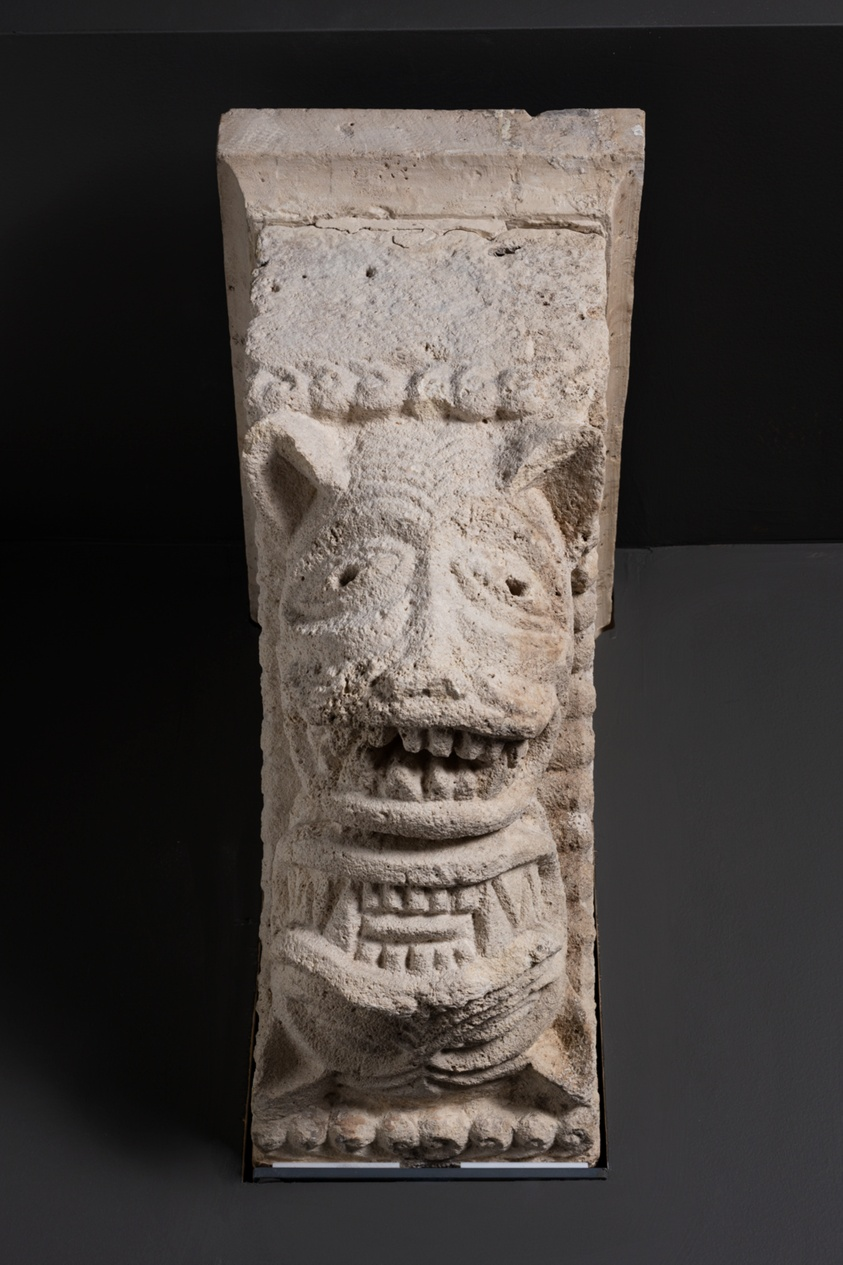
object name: Sculpture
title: Corbel with Two Animal Masks from the Monastery Church of Notre-Dame-de-la-Grande-Sauve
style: medieval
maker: French; Aquitaine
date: 1150/1200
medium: Limestone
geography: France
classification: sculpture; architectural detail; architectural fragment; architecture; fragment; france; french; limestone; sculpture/stone; stone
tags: corbel, animals, architechture, architectural, architectural detail, architectural fragment, architectural fragments, architecture, architecture, masks